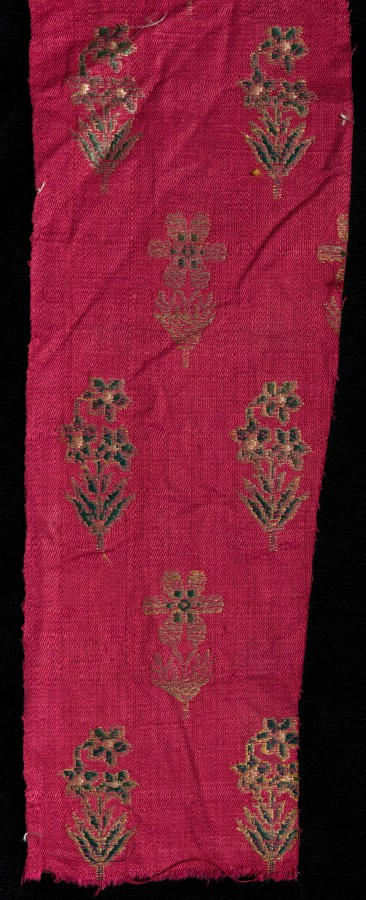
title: Fragment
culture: India, 19th century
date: 1800s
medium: brocade; silk and metal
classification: Textile